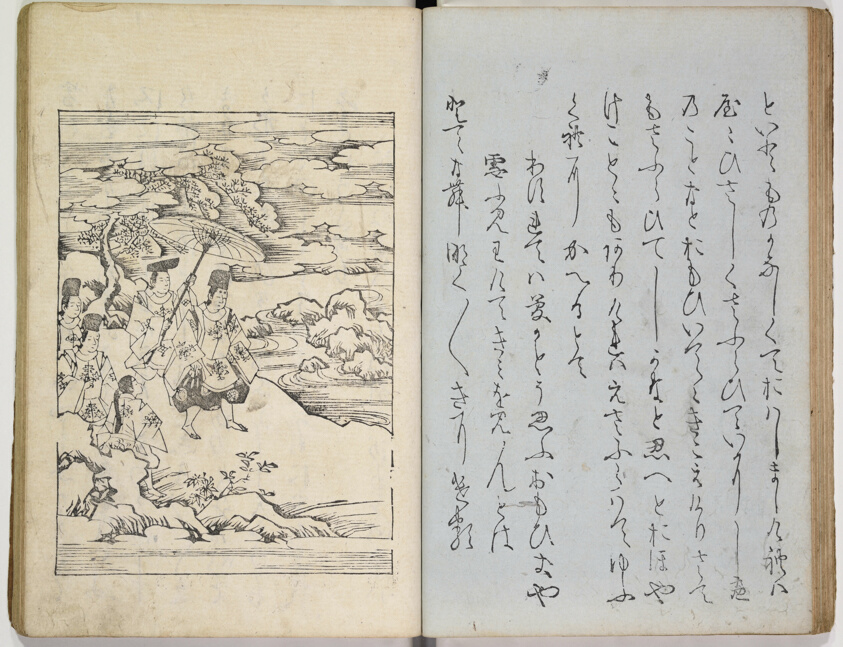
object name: Book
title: Tales of Ise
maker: Artist unknown, Japanese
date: 1608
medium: Woodblock-printed book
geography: Japan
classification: book